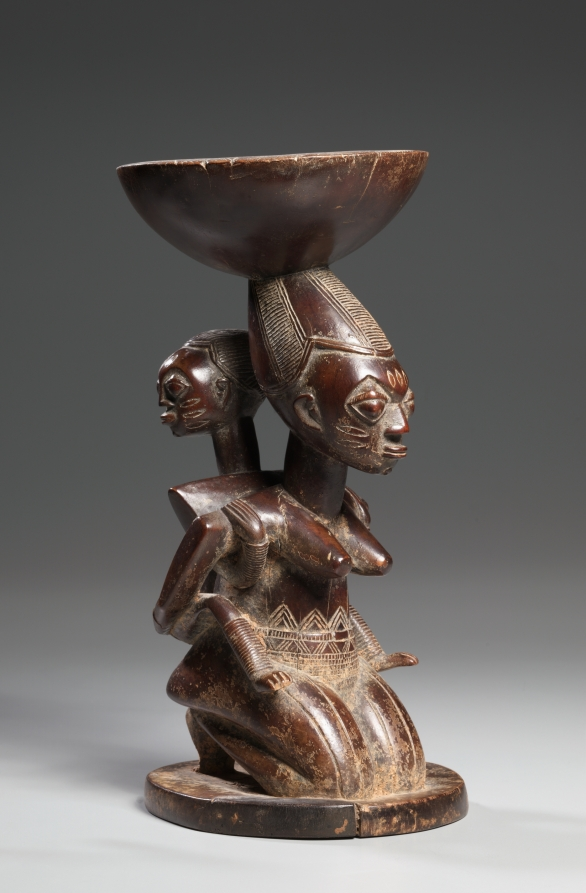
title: Ifá divination vessel (àgéré Ifá)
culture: Africa, West Africa, Nigeria, possibly Èkìtì State, Yorùbá-style carver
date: mid- late 1800s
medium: Wood and colorant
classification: Sculpture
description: The mother figure of this vessel from the Southern Ekiti region represents a devotee who kneels before the gods. The vessel once held the 16 sacred palm nuts essential to divination rituals. The object was used by a priest as a medium through which to communicate with the god of fate, Orunmila, in order to gain insight into an individual’s destiny or to understand the cause of misfortune.